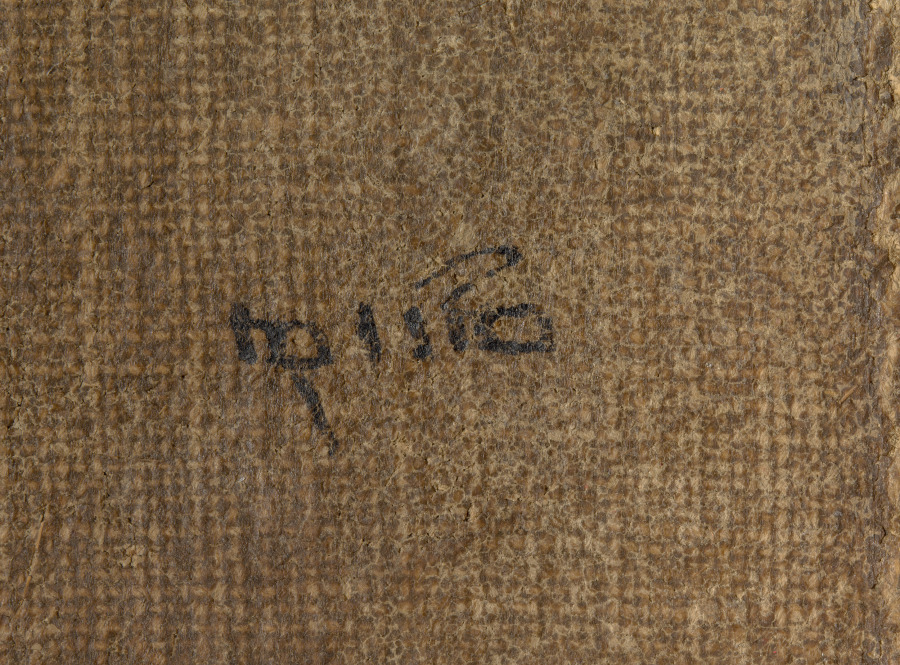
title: Seated Amitabha with Attendants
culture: India, Western Himalayas, Lahul and Spiti, Tabo Monastery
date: c. 1100s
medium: Gum tempera and ink on sized cotton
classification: Painting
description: The red Buddha of the West, Amitabha, seated in meditation on his throne, is flanked by bodhisattvas. Above are two rows of monks who transmit his teachings, and along the bottom is a row of six adepts, skilled practitioners of magic and the recitation of mantras to reach enlightenment quickly. In front of his throne are the three flaming jewels of Buddhism: the Buddha, his teaching (dharma), and the spiritual community (sangha). Its unfinished state reveals the fluid and accomplished ink drawing delineating all the forms. This painting is one of the earliest surviving thangkas—devotional Buddhist paintings on cloth. It is from the region ruled by the Guge kings of western Tibet from the 900s to 1600s, now partially within the national borders of India.